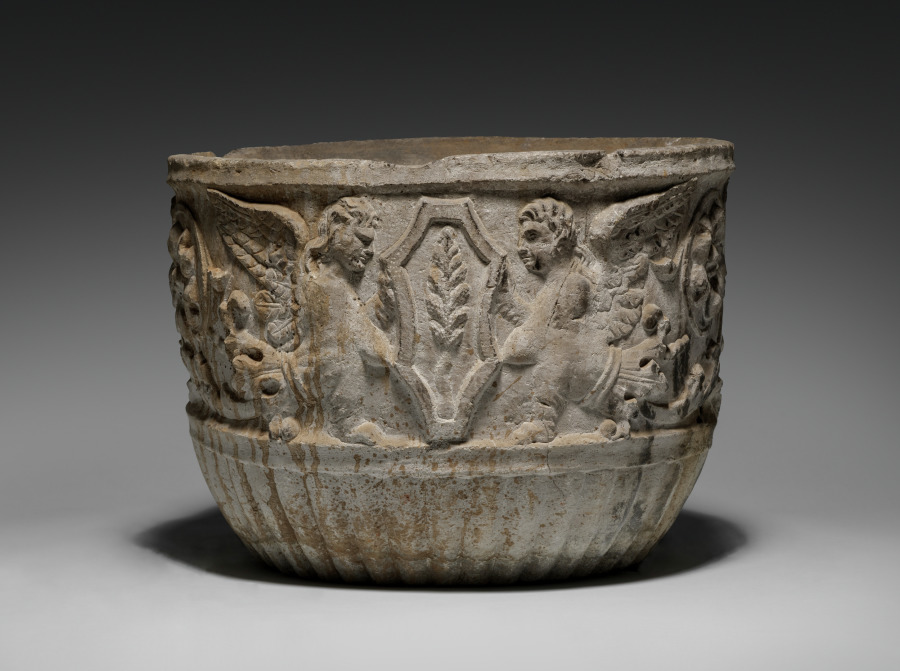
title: Garden Pot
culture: Italy, 19th century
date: 19th Century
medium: stone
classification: Miscellaneous